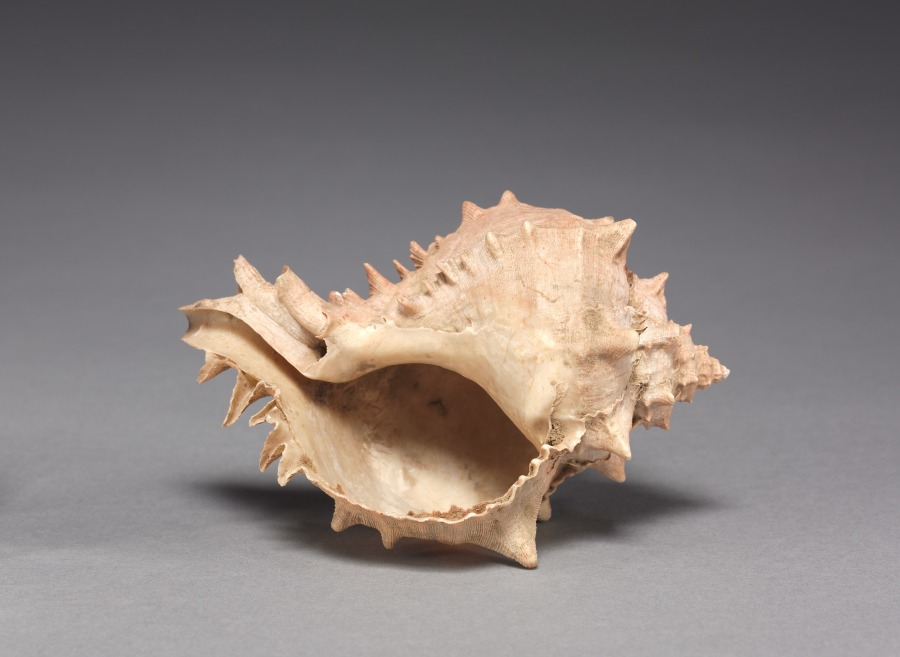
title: Offering Group: Large Shell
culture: Mexico, Guerrero(?), San Jerónimo de Juárez, Xochicalco style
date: c. 800–1200(?)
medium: shell, red pigment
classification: Sculpture